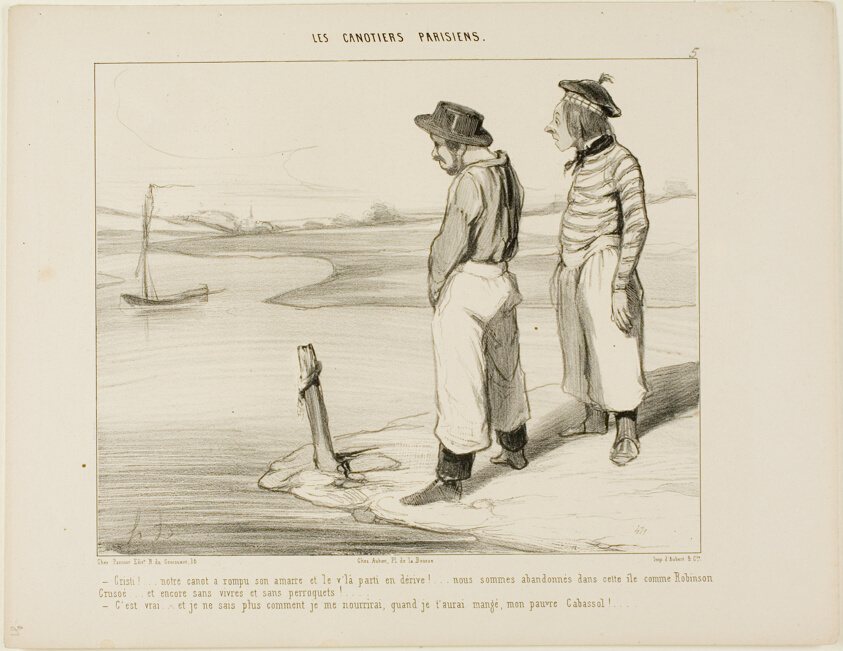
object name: Print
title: “- Our boat let go the anchor and has drifted away.... we're stuck on this lonely island like Robinson Crusoe... and without anything to eat and no parrot... - That's true.... and I really don't know what to eat, once I have devoured you, poor Cabassol!,” plate 5 from Les Canotiers Parisiens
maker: Honoré Victorin Daumier; French, 1808-1879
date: 1843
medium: Lithograph in black on ivory wove paper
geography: France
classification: lithograph; print; prints and drawing